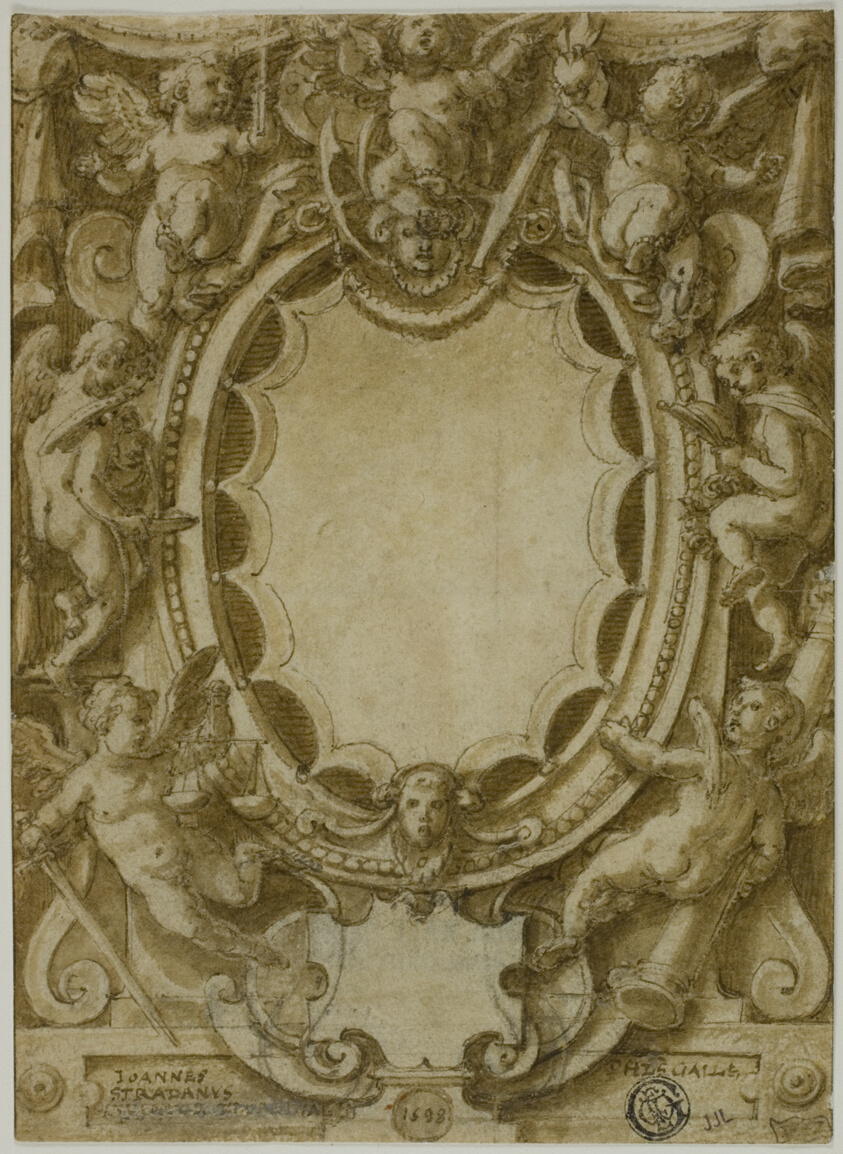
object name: Drawing and Watercolor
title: Design for Frontispiece to the Seven Virtues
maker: Joannes Stradanus, called Giovanni Stradano; Flemish, 1523-1605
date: 1598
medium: Pen and brown ink and brush and brown wash, with touches of opaque white watercolor, over traces of black chalk, on cream laid paper, incised for transfer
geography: Flanders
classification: ink with wash; drawings (visual works); prints and drawing